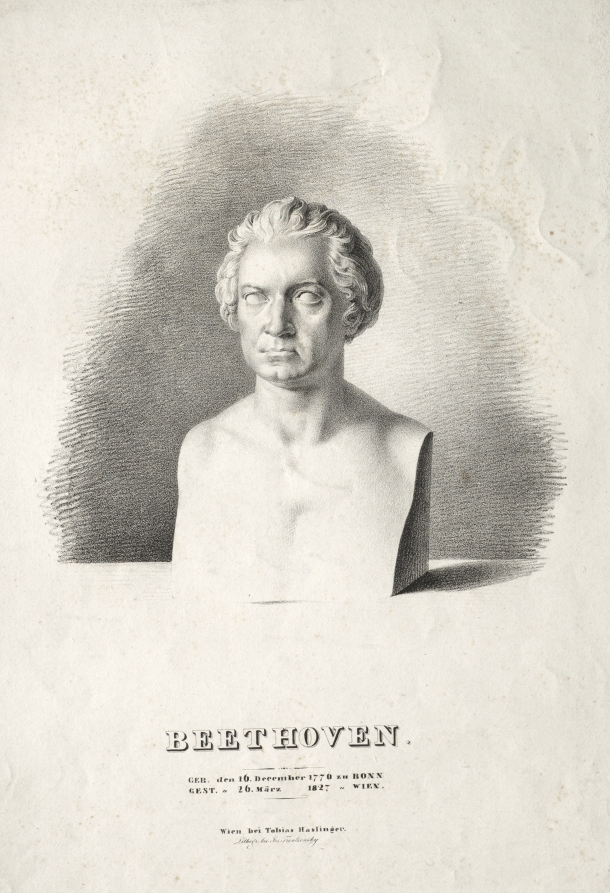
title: Bust of Ludwig van Beethoven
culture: Austria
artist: Josef Kriehuber (Austrian, 1800–1876)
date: 1827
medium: lithograph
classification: Print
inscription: Imprinted on recto: "BEETHOVEN/GEB. den 16 December 1770 zh BONN/GEST. 26 März 1827 WIEN/Wien Tobias Haslinger/Lithogr. bei Fes. Trentsensky"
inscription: Watermark: "Gh. K. REAL"